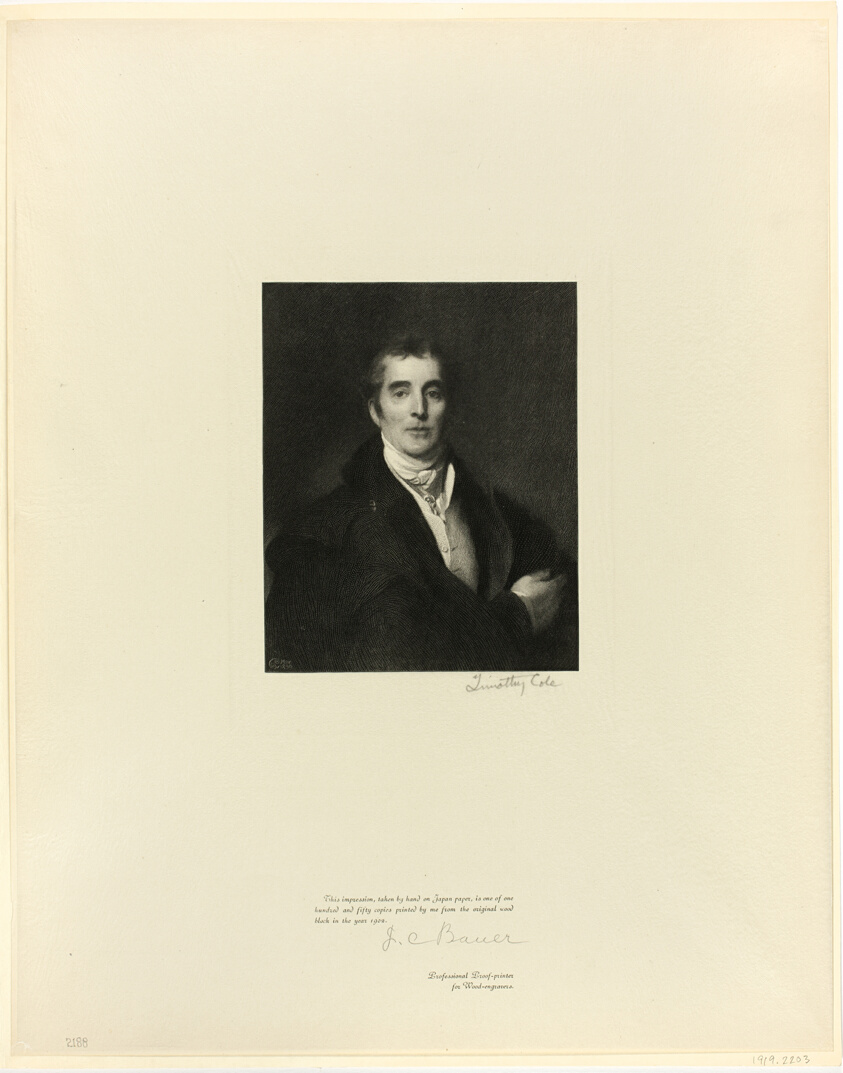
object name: Print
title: The Duke of Wellington, from Old English Masters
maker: Timothy Cole (American, born England, 1852-1931); after Sir Thomas Lawrence (English, 1769-1830)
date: 1899, printed 1902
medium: Wood engraving on chine paper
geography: United States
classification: wood engraving; print; prints and drawing